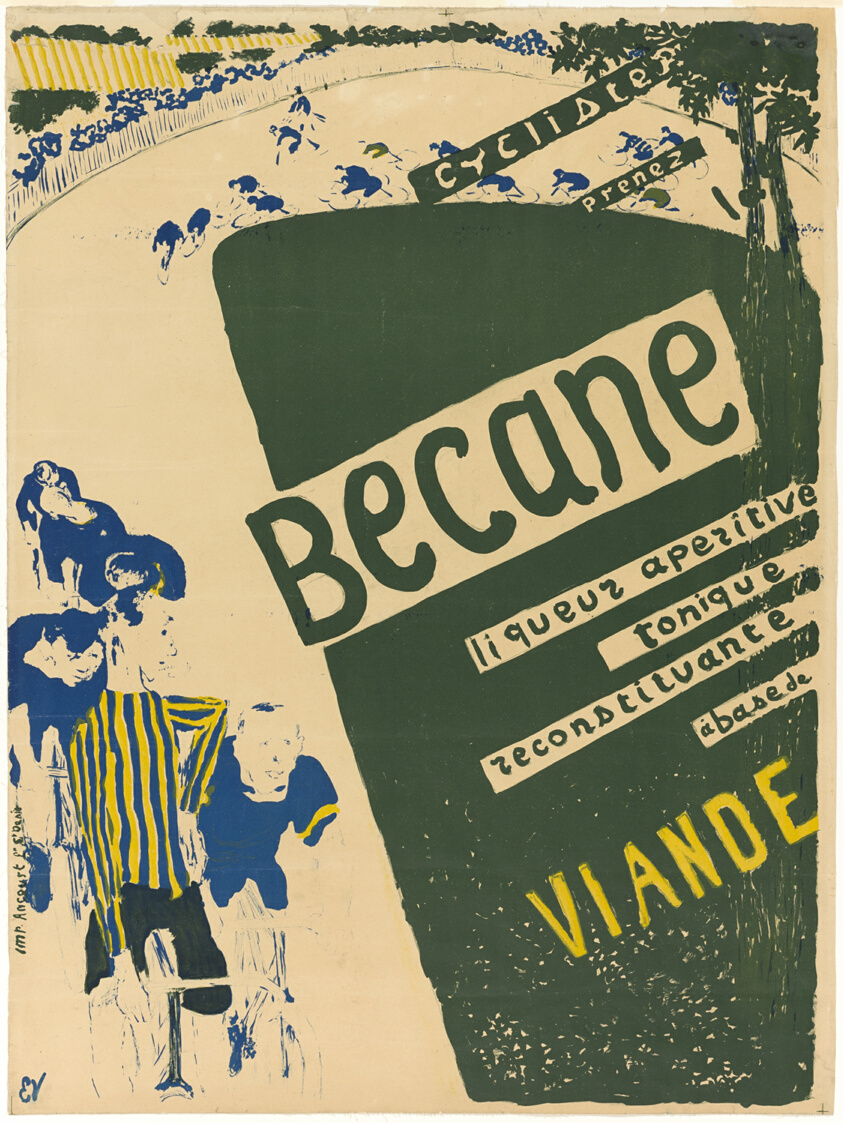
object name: Print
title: Bicycle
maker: Edouard Jean Vuillard; French, 1868-1940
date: c. 1894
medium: Color lithograph on cream wove paper laid down on linen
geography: France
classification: lithograph; print; prints and drawing